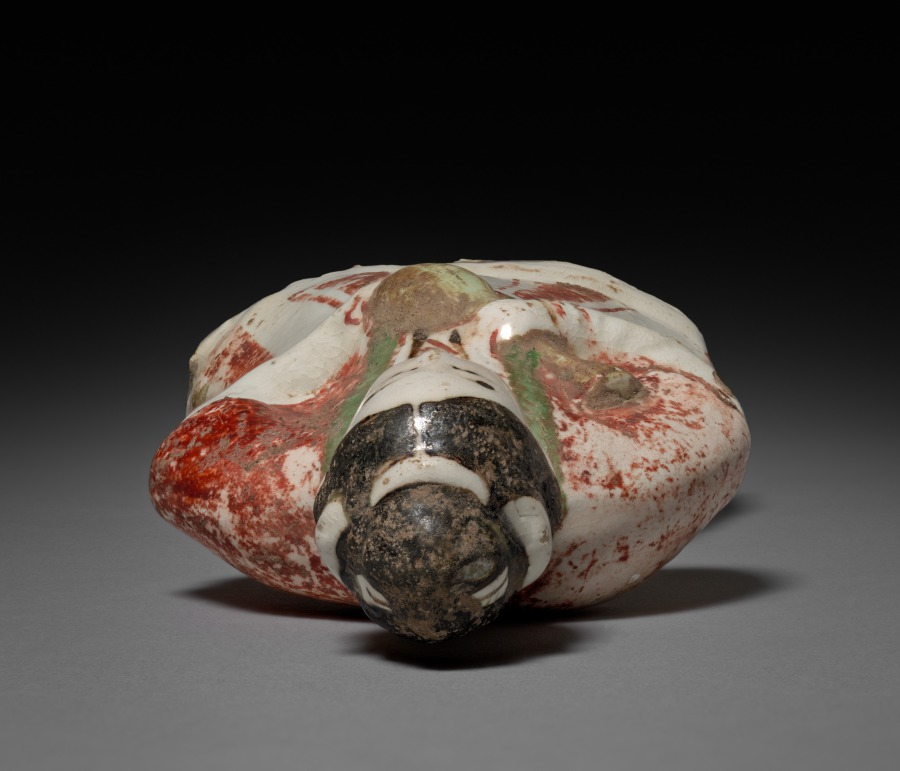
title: Lady Holding a Vase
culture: China, Northern Song dynasty (960-1127) - Jin dynasty (1115-1234)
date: 1100s–1200s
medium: Stoneware with slip decoration, Cizhou ware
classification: Ceramic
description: The Cizhou ware kilns never produced for the imperial court, but made potted utensils needed in daily life. They also fired ceramic figurines, which are believed to have been used as toys. The maid or palace lady here holds a long-necked vase of a type that watered flowers. The figurine, perhaps made as a toy for a girl, was molded in clay and covered with a white slip and transparent glaze, over which some colors in red, green, and ocher were applied. Cizhou kiln potters were one of the first in China who applied overglaze enamel-like colors on glazed, high-fired ceramics.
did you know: This hollow stoneware figure of a woman has firing hole visible at the bottom.